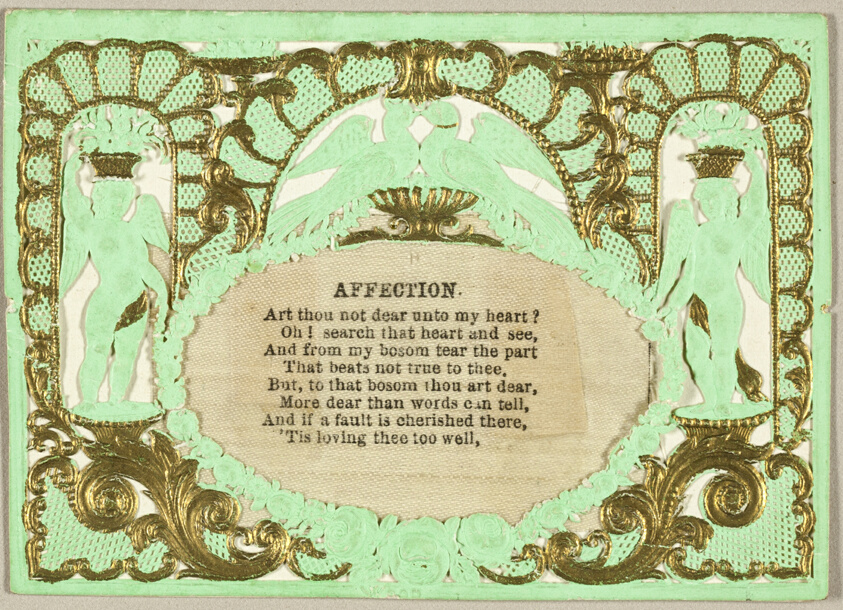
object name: Drawing and Watercolor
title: Valentine Affection (valentine)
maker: Thomas Wood (English, 19th century)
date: 1855/60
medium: Collaged element and gold and green paint on cut and embossed (designed) ivory wove paper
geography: England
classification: collage; valentine; prints and drawing; paper